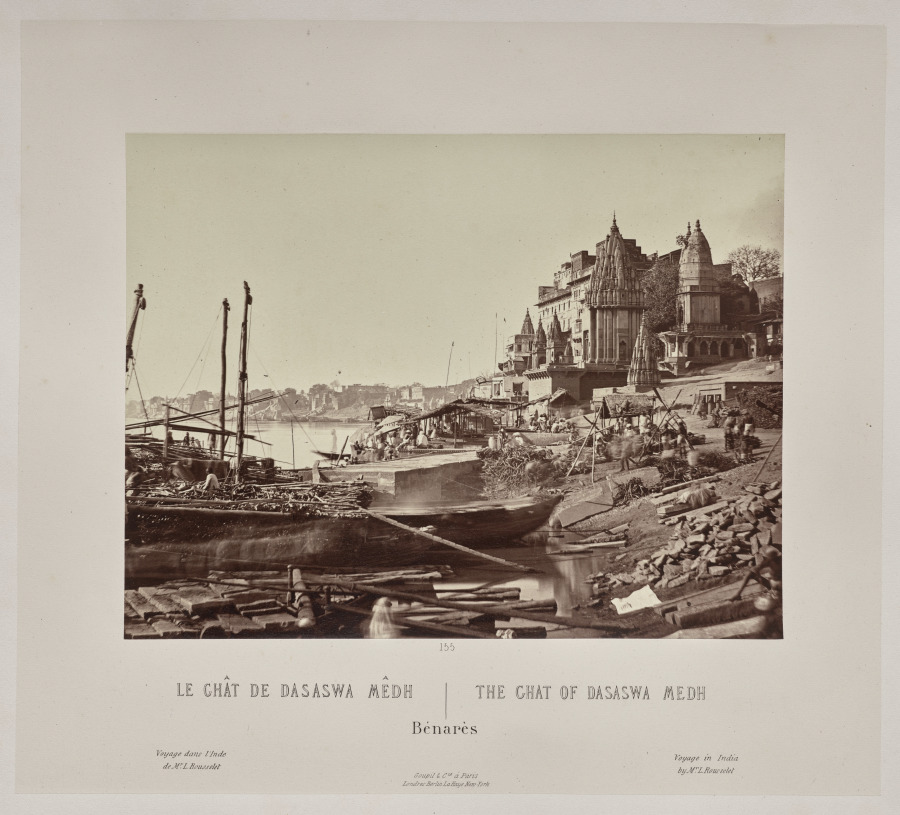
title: The Ghat of Dasaswa Medh, Bénarès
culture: France, 19th century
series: India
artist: Louis-Théophile Marie Rousselet (French, 1845–1929)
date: 1865–68, published 1869–70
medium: Albumen print from glass plate negative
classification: Photograph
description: Concerned that his drawings did not do justice to the splendor of India’s monuments, Rousselet learned photography in India that year, a remarkable accomplishment. He proved to be a talented photographer with a sophisticated sense of composition. The scenes in this volume sweep across sites of Sultanate, Rajput, and Mughal power in northern India, from the sacred Hindu city of Varanasi on the Ganges River to Alwar in Rajasthan. Also included are several scenes of industry and portraits of Indian rulers.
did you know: Louis Rousselet described himself as a “scientific traveler” when he went to India alone at age 18 in 1863 and stayed into 1868.